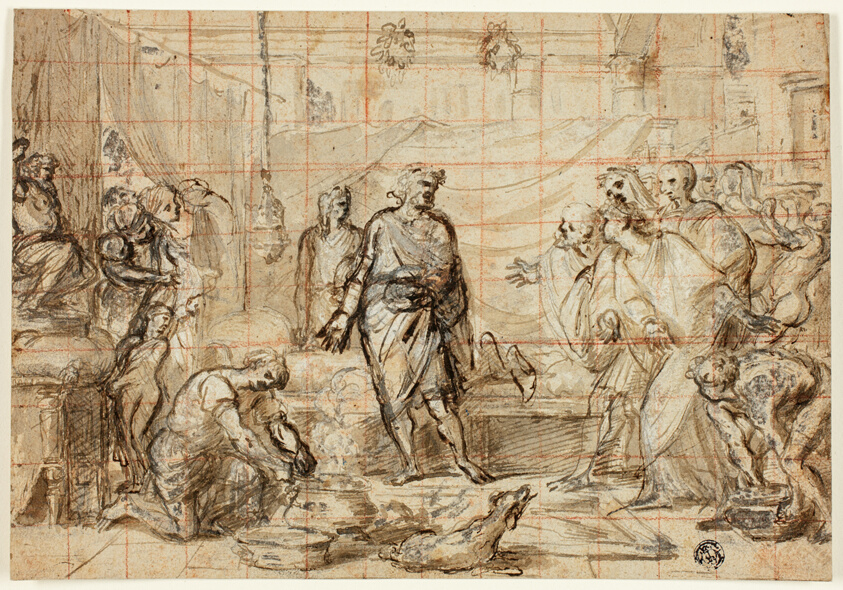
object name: Drawing and Watercolor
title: Death of Seneca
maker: Attributed to Mathieu Ignace van Brée; Belgian, 1773-1839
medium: Brush and brown ink, with brush and brown wash, heightened with lead white (partly discolored), with traces of graphite and possibly charcoal, squared in red chalk on cream laid paper, laid down on tan wove paper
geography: Belgium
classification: ink or chalk wash; drawings (visual works); prints and drawing